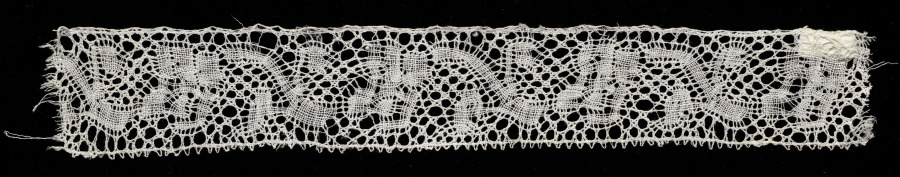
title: Lace Insertion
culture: Spain, Huelva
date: 1700s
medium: Bobbin lace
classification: Lace